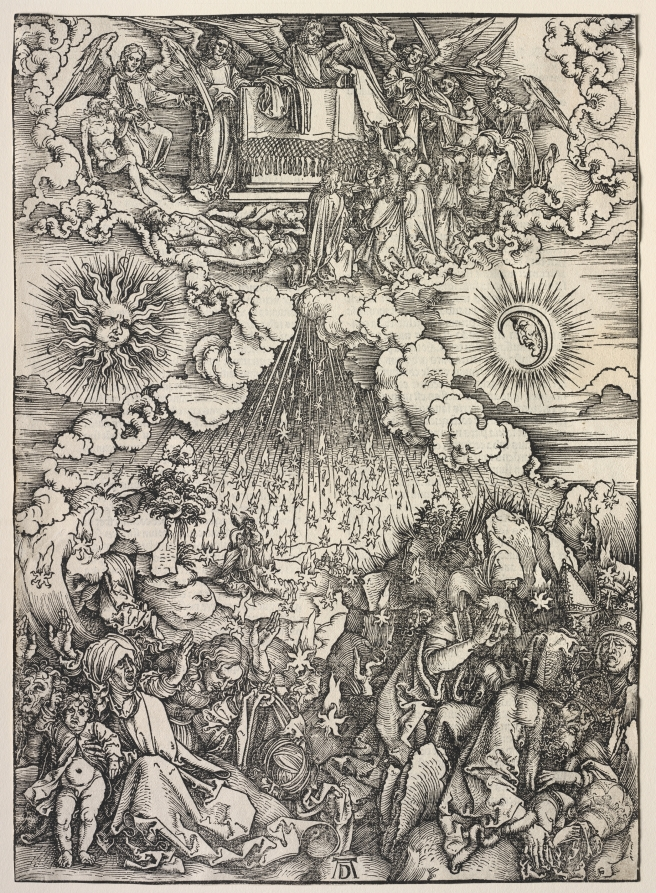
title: Revelation of St. John: Opening of the Sixth Seal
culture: Germany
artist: Albrecht Dürer (German, 1471–1528)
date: 1511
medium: woodcut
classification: Print